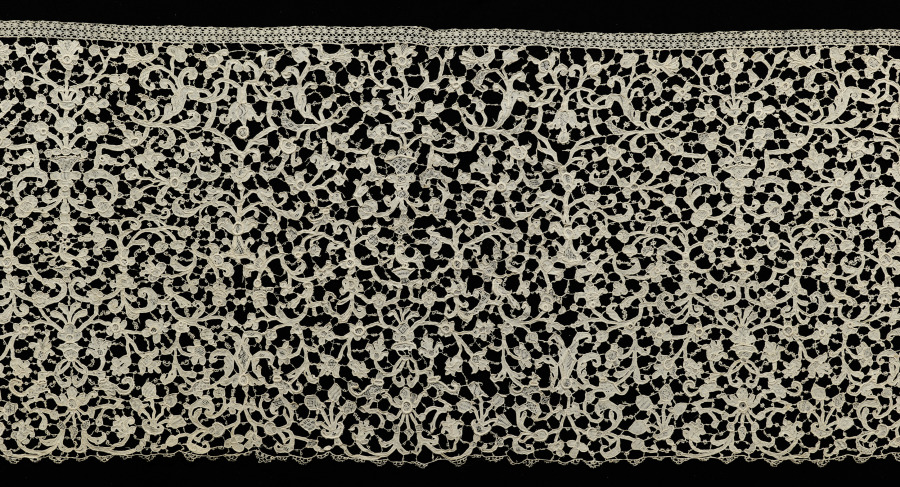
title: Lace Flounce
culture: Italy, Venice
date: 1660–99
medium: Needle lace (Venetian Rose Point-Punto Rosallino)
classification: Lace